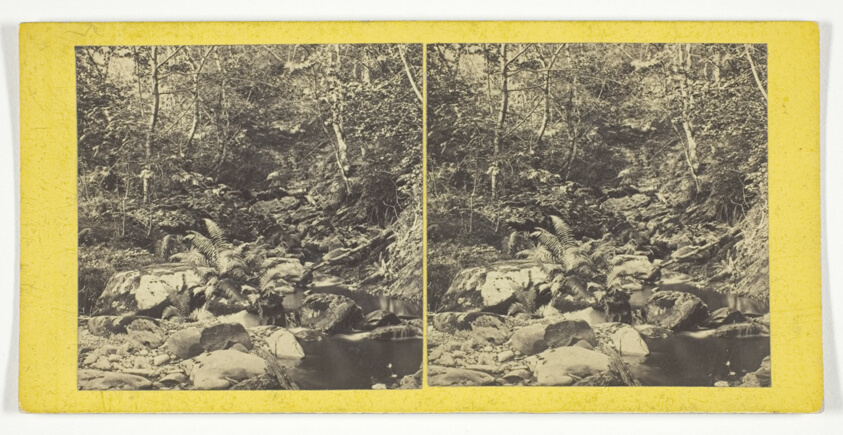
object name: Photograph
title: Bit in the Trossachs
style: 19th century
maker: G. W. Wilson (Scottish, 1823–1893)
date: Mid 19th century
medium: Albumen print, stereo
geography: Scotland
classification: photography; photograph